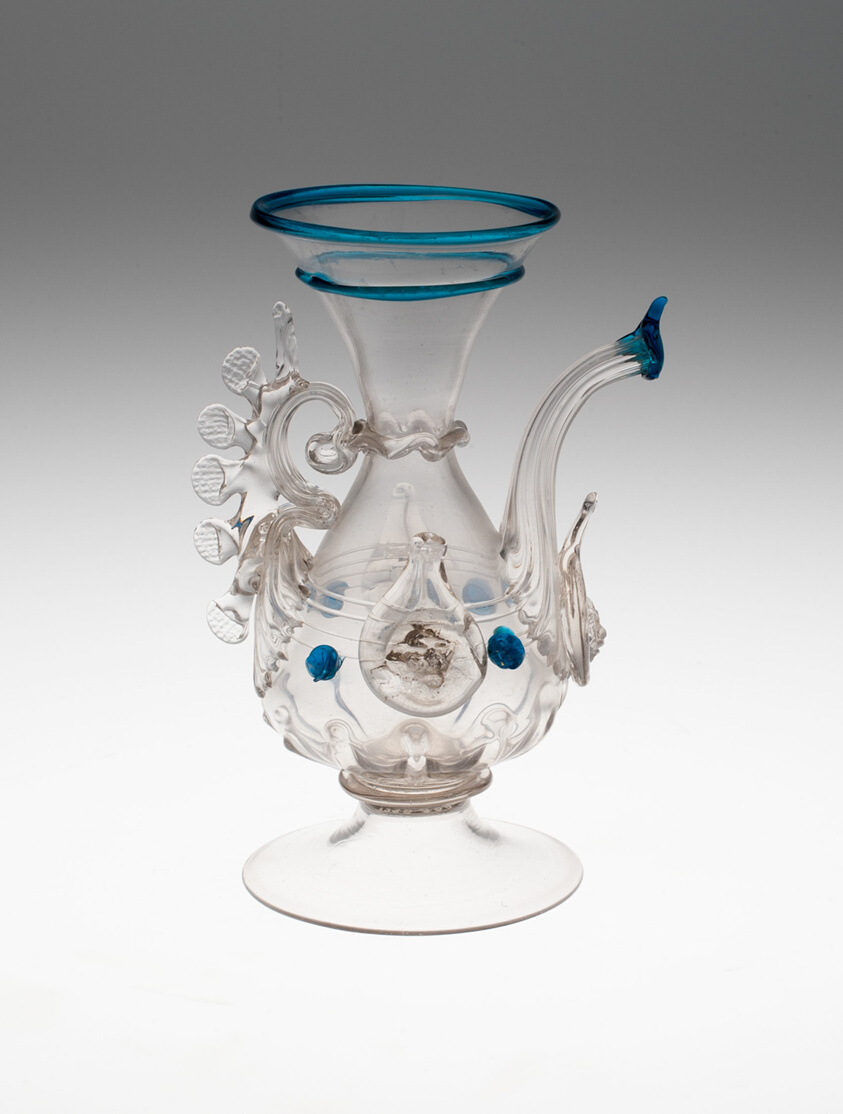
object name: Glass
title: Ewer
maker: Dutch or Flemish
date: c. 1700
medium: Colorless glass with blue glass trails and prunts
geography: Netherlands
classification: ewer (vessel); vessel; glass; european decorative arts